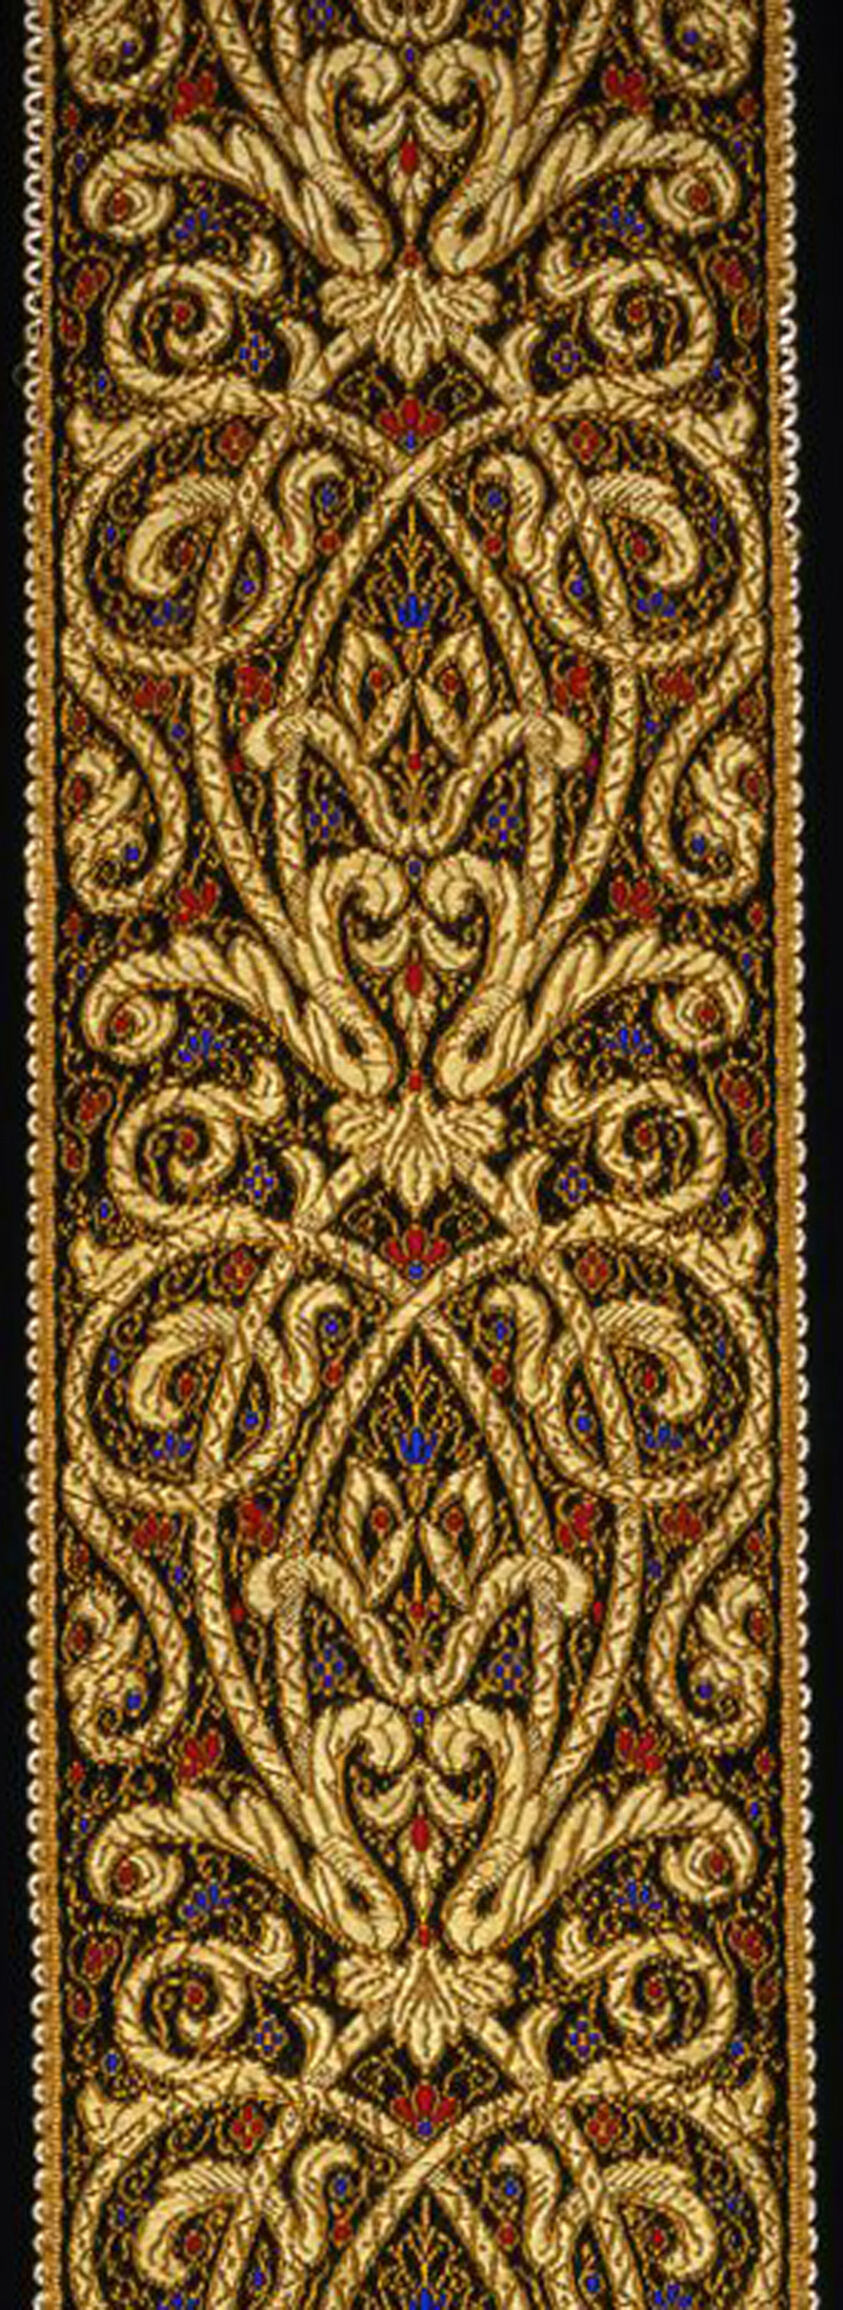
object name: Textile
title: Ribbon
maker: Probably France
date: c. 1870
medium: Silk, warp-float faced satin weave with supplementary brocading wefts, and self-patterned by two-color complementary ground weft floats and areas of plain interlacing; woven on a loom with Jacquard attachments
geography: France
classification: textile; weaving